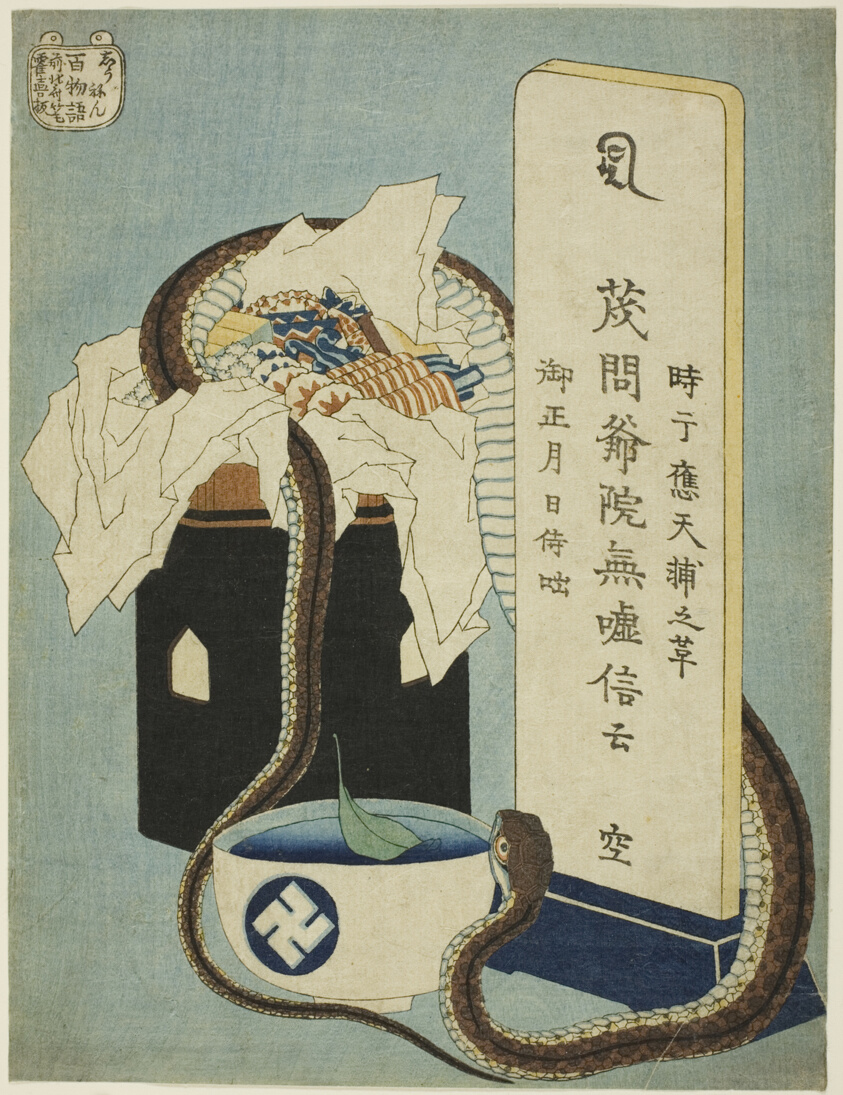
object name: Print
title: Memorial Anniversary (Shunen), from the series "One Hundred Ghost Tales (Hyaku monogatari)"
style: Japanese (culture or style)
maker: Katsushika Hokusai 葛飾 北斎 (Japanese, 1760-1849)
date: 1831-32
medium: Color woodblock print; chuban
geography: Japan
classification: woodblock print; print; asian art